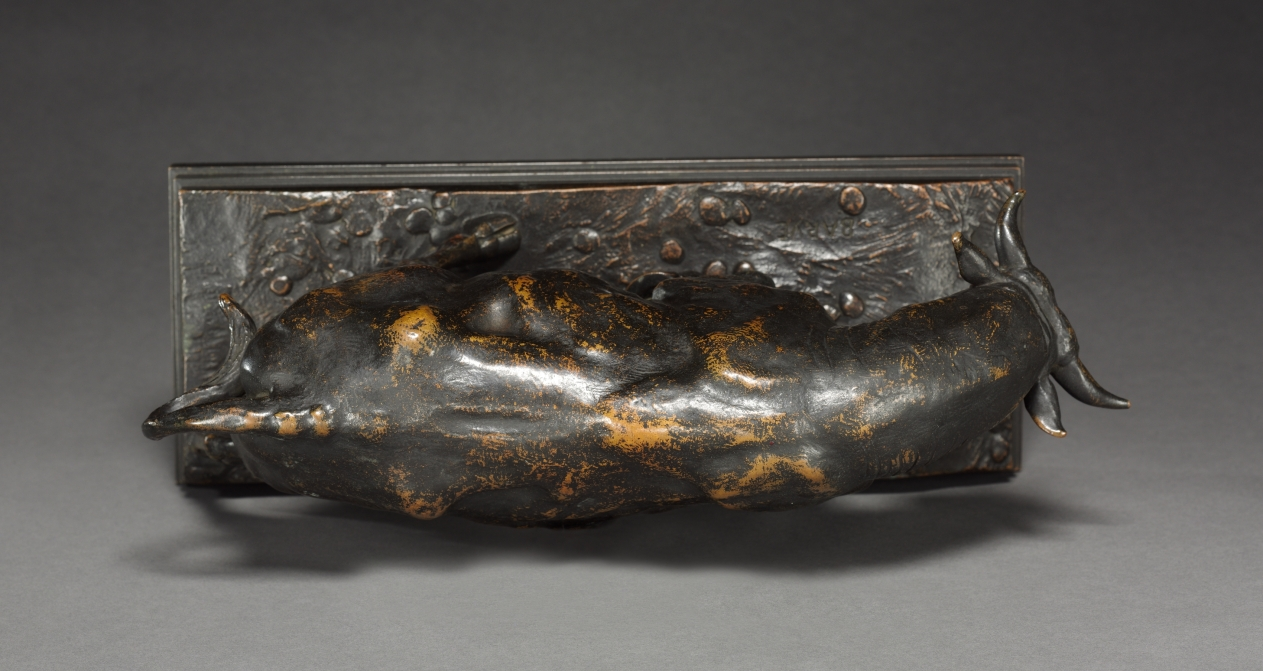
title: Bull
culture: France, 19th century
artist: Antoine-Louis Barye (French, 1796–1875)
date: c. 1841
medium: bronze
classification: Sculpture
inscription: Signed: "Barye"